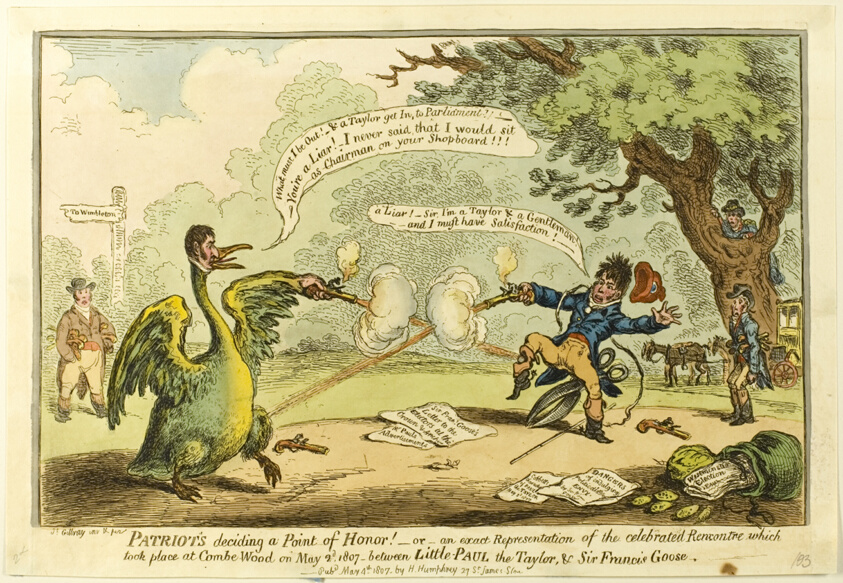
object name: Print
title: Patriots - Deciding Point of Honor!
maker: James Gillray (English, 1756-1815); published by Hannah Humphrey (English, c. 1745-1818)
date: published May 4, 1807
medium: Hand-colored etching on paper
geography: England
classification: etching; print; prints and drawing